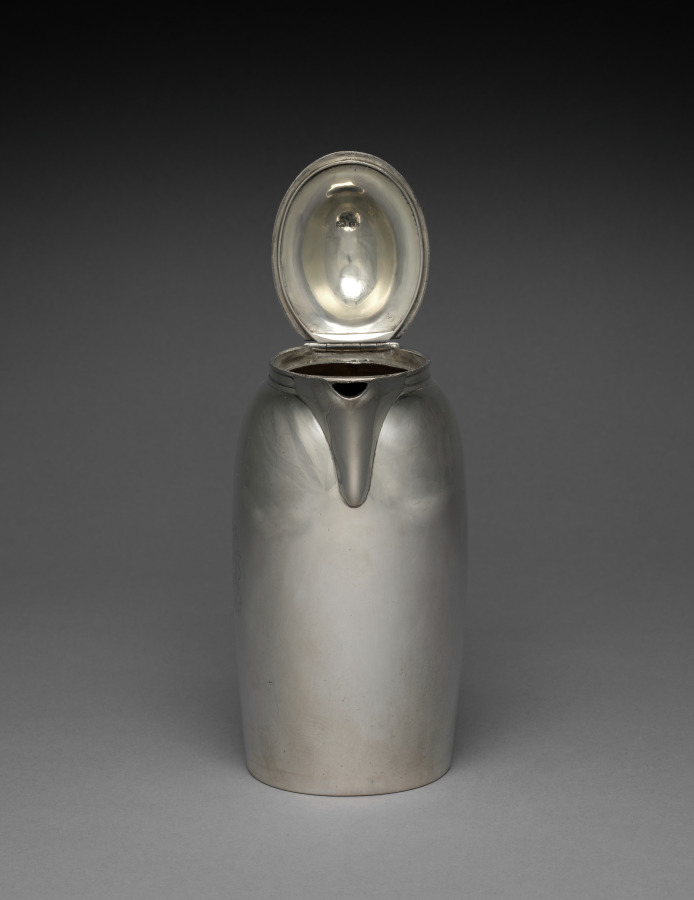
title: Hot Water Jug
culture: England, early 19th century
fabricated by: John (British) Edwards (British)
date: 1800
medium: silver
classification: Metalwork